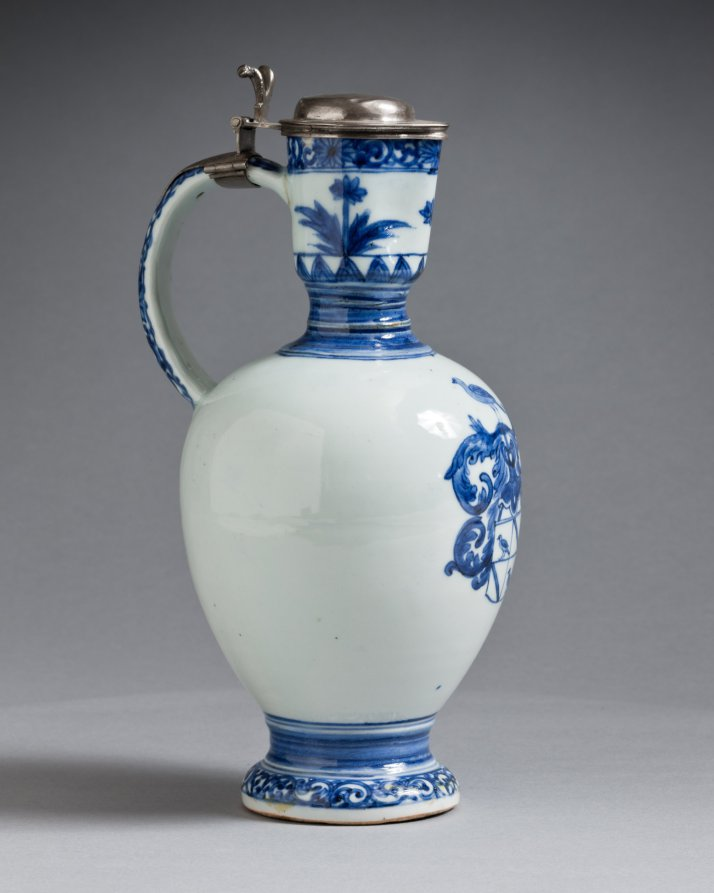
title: Jug with Silver Mounts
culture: Japan, Edo period (1615–1868)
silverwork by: Barent van Leeuwen (Dutch, 1637–1682)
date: c. 1662–76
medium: porcelain with underglaze blue decoration and silver mounts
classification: Ceramic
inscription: [on silver]: town mark for Amsterdam; lion rampant crowned (alloy mark for 0-934 silver); d (date letter for 1666), maker's mark of Barent van Leeuwen.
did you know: The coat of arms on this jug are those of the Valckenier family, active in the Dutch East India Company.